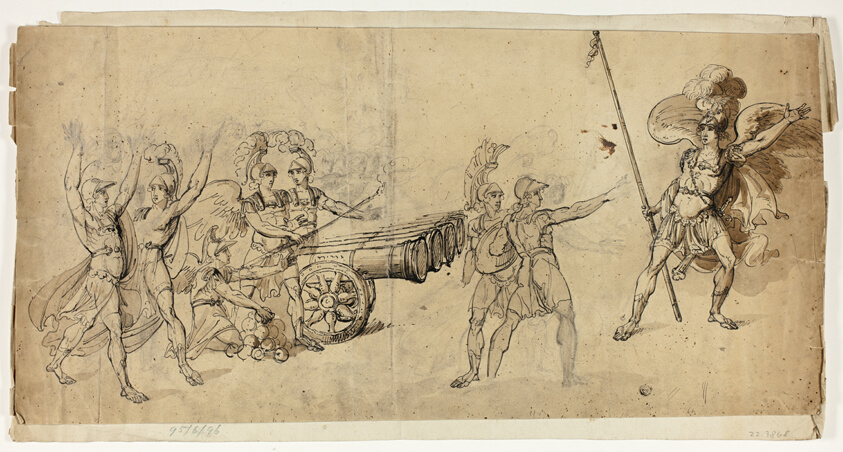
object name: Drawing and Watercolor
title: Angelic Artillery (recto); Battle Scene (verso)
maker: Unknown Artist; British, 19th century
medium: Pen and black ink and brush and brown wash, with graphite (recto), and graphite (verso) on tan wove paper, tipped onto cream laid paper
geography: United Kingdom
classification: pen and ink drawings; paper; drawings (visual works); prints and drawing; brush and wash